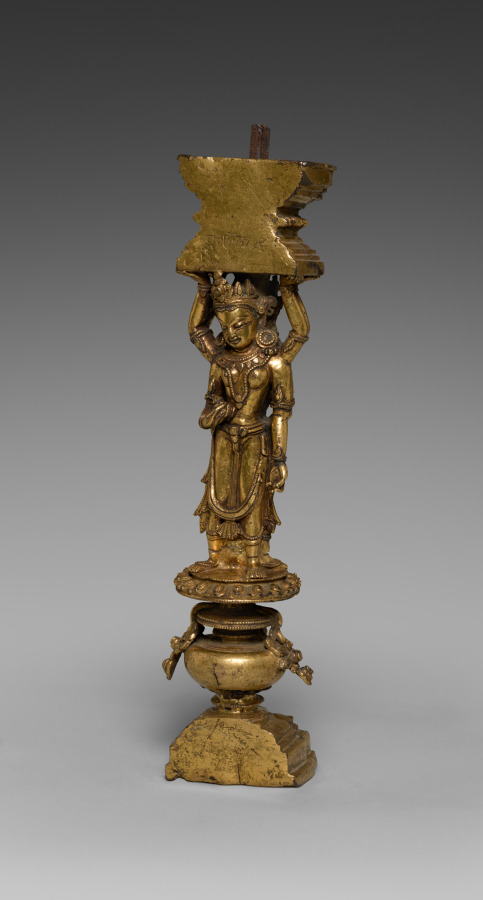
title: Support with Addorsed Figures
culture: Tibet, Densatil Monastery, 15th century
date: 1400s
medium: gilt bronze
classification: Sculpture